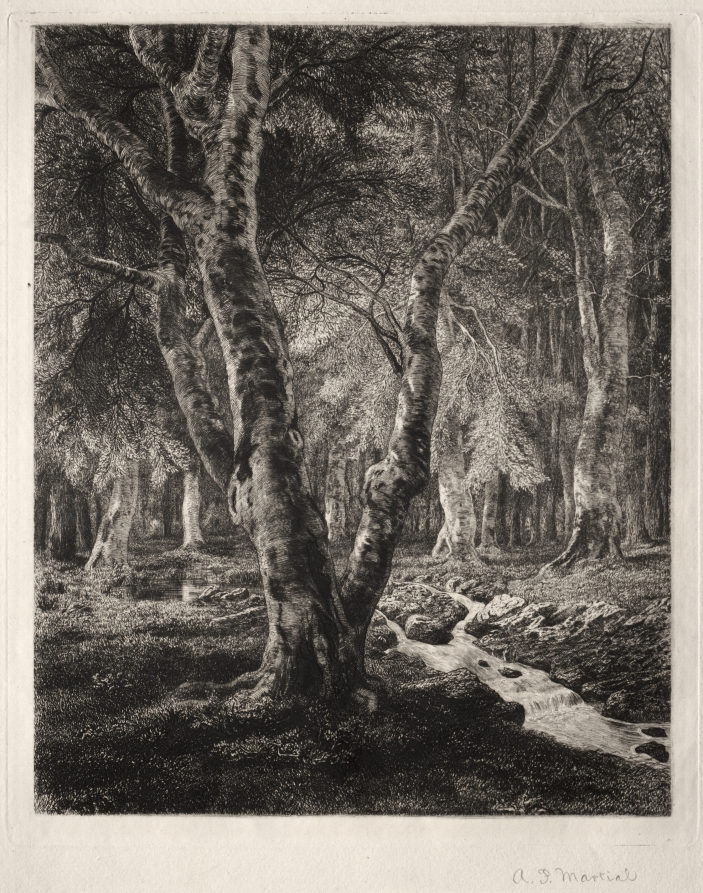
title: Forest of Pierrefonds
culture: France, 19th century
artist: Adolphe Théodore Jules Martial Potémont (French, 1828–1883)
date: 1874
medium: etching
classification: Print